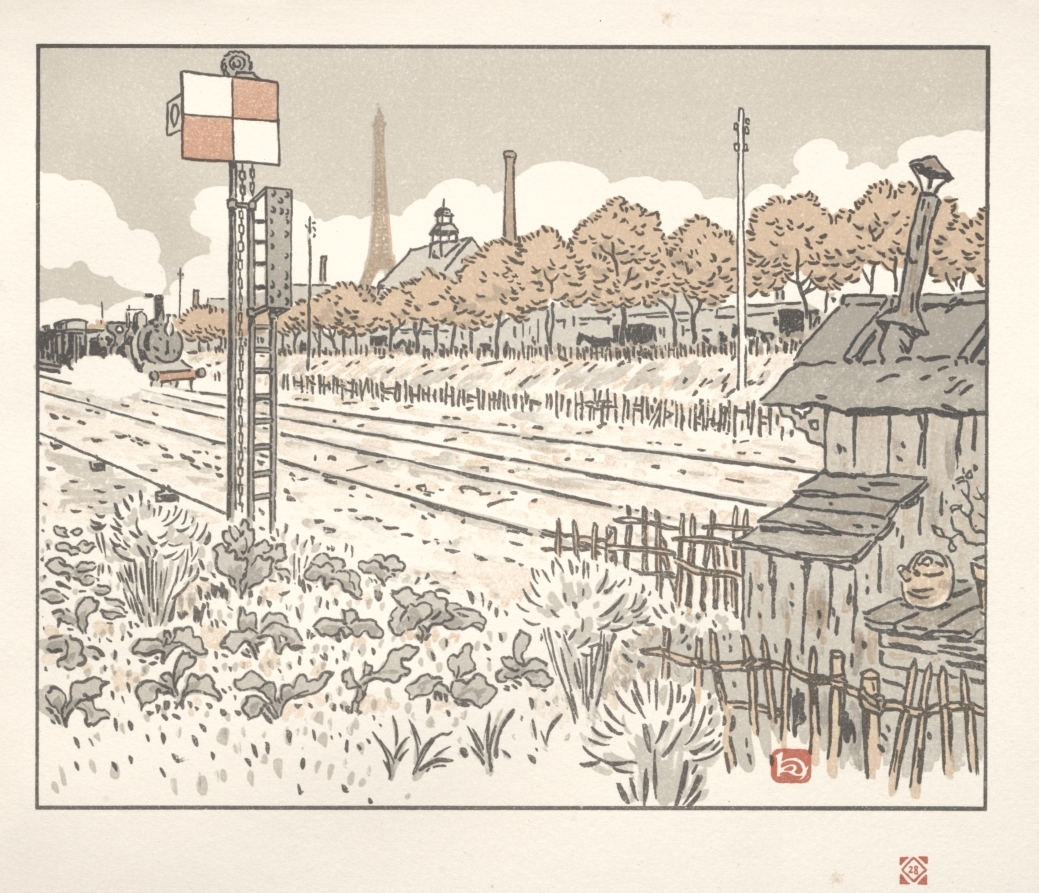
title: Thirty-Six Views of the Eiffel Tower: From the Quai de Javel (Switchman's Shanty)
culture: France, early 20th century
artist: Henri Rivière (French, 1864–1951)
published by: Printed by Verneau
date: 1902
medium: color lithograph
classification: Print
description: The switchman’s principal duty was to switch tracks to direct an oncoming train to its destination, regulate a train’s speed, and signal the open track to the train conductor. The red and white checkered flag was used for the latter purpose and was placed on the side of the open tracks. The switchman was also responsible for manning the telegraph, whose white poles line the opposite side of the tracks. When he was off duty, the switchman grew vegetables on the bank bordering the railway, as was the custom with railway workers.